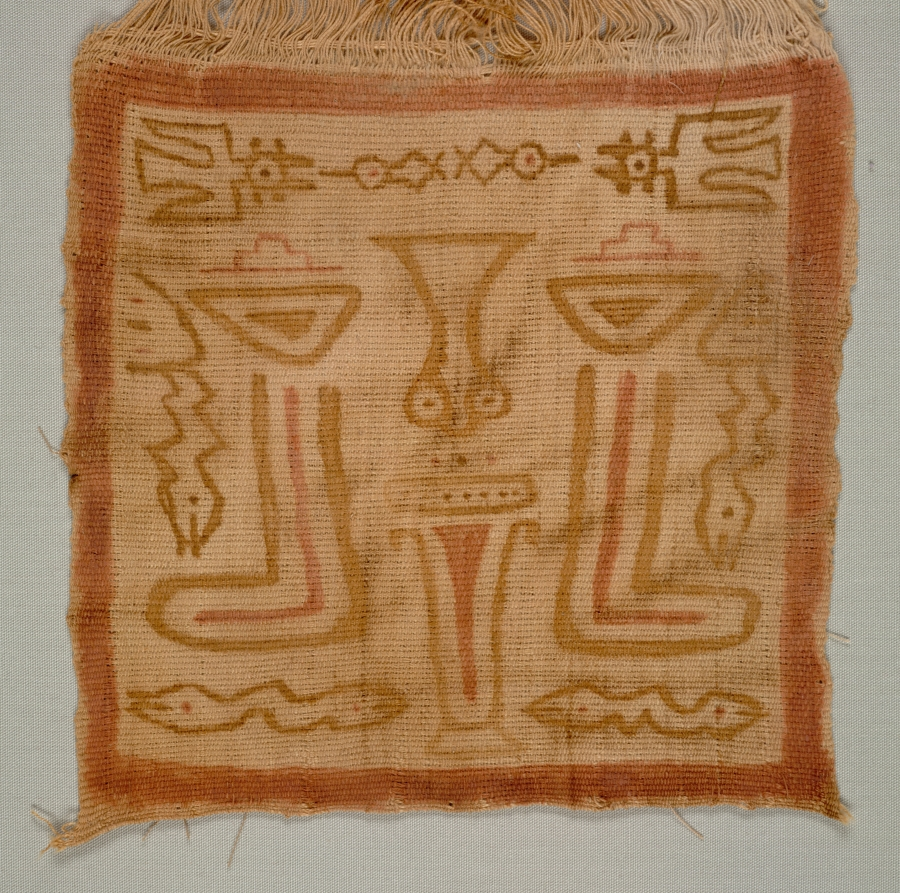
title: Mummy Bundle "Mask"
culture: Peru, South Coast, Ica Valley, Ocucaje site, Paracas style (700 BCE–1 CE)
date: 400–200 BCE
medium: cotton and pigment, plain weave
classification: Textile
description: The Paracas people buried their dead in bundles that they created by carefully wrapping the seated human body in layers of garments and other textiles. In some cases, they placed a painted cloth—such as these examples—on the outer layer and at the top of the bundle. The hair-like yarns (unwoven warps) were arranged around a solid cotton disk that was sometimes wrapped with a headband. The cloths, then, seem to have functioned as the bundle’s head, even though some are painted not with faces but with complete figures whose supernatural character is marked by the appendages streaming from their bodies.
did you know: These masks fall into two categories, those with only a face and those with a full-bodied figure.